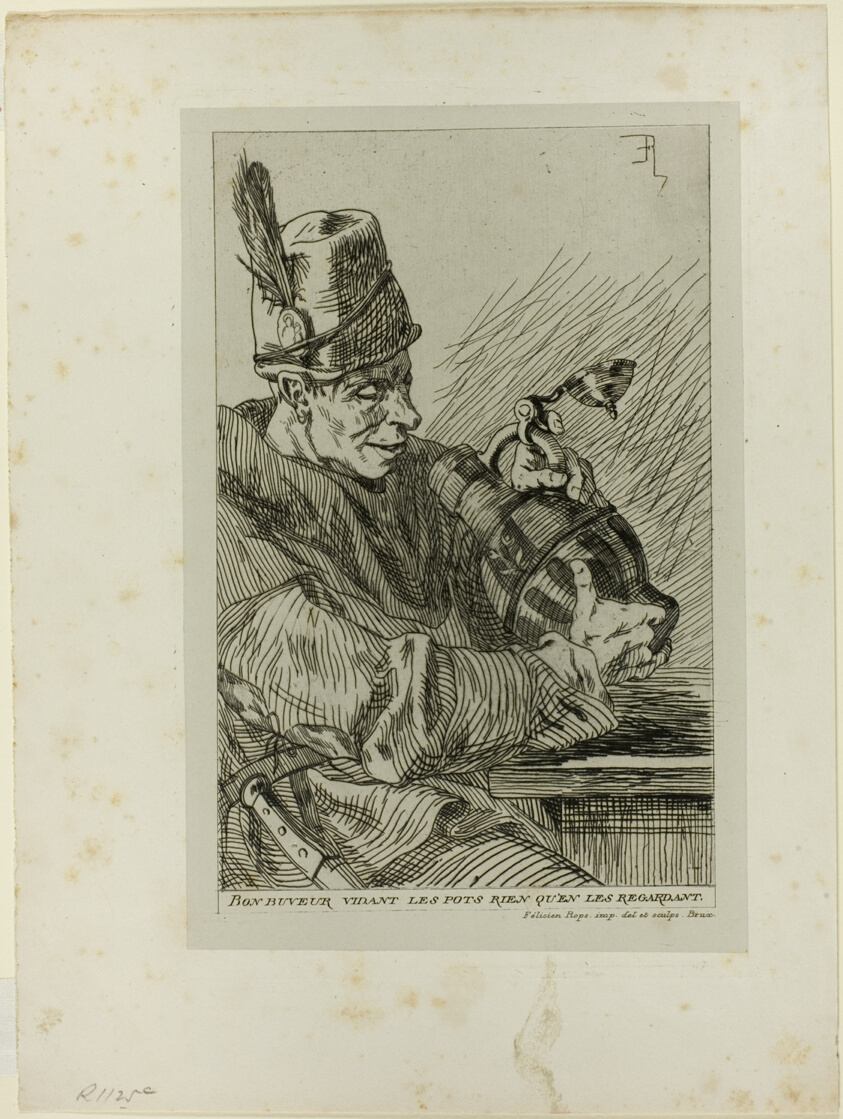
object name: Print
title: The Drinker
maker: Félicien Rops (Belgian, 1833-1898)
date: 1867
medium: Etching on gray chine, laid down on ivory wove paper (chine collé)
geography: Belgium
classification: etching; print; prints and drawing